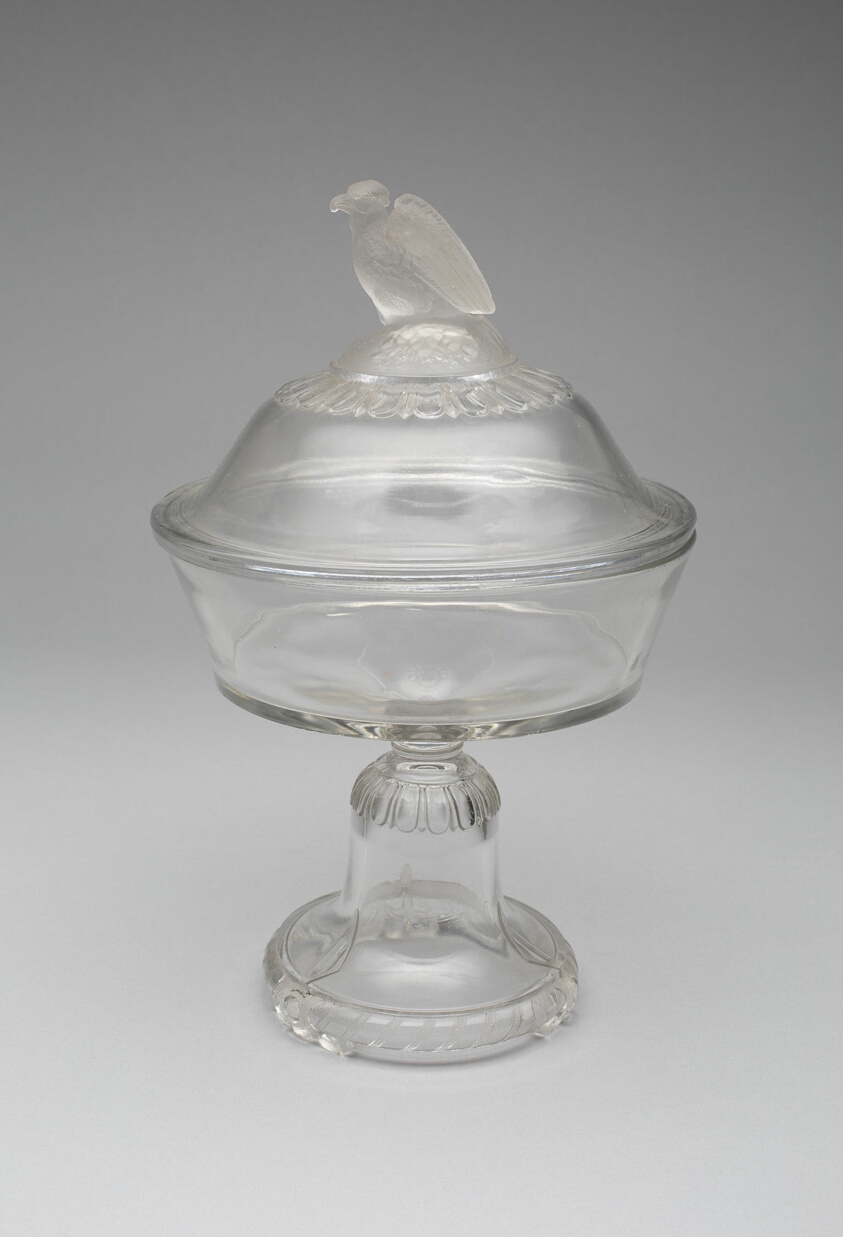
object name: Glass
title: "Old Abe/Frosted Eagle" pattern covered compote on pedestal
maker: Attributed to Crystal Glass Company; Bridgeport, Ohio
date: 1880–90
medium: Glass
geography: Ohio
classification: compote; glass; vessel for serving food; american decorative arts; american arts; decorative arts